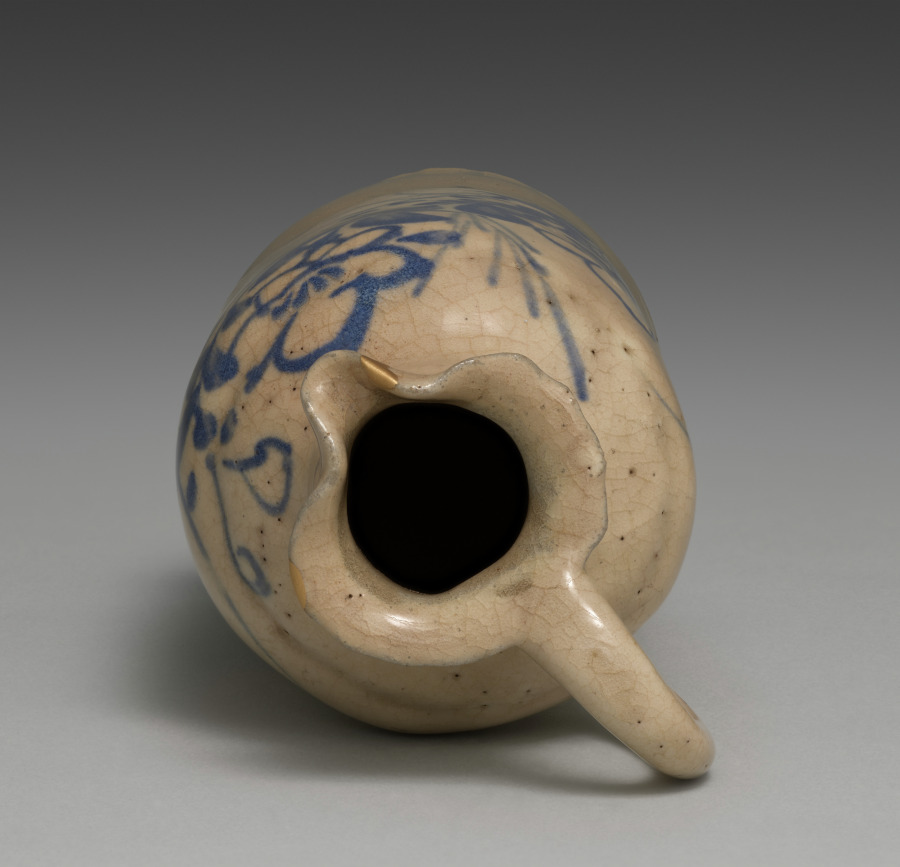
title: Sake Pourer with Bellflowers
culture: Japan, Edo period (1615–1868)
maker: attributed to Seifū Yohei I (Japanese, 1801–1861)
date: c. 1844–57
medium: one of a pair of sake flasks; stoneware with white slip, underglaze blue and gold repair (kintsugi) (Kyoto ware)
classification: Ceramic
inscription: The storage box for the pair of vessels is inscribed and impressed with seals.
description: This pair of sake pourers adorned with with bamboo and bellflowers is attributed to the founder of the Seifū Studio, Seifū Yohei I (1801–1861). Yohei I, the lineage founder, was born to the Yasuda family in the city of Kanazawa, which faces the Sea of Japan. His home province of Kaga (in present-day Ishikawa Prefecture) produced its own ceramics, known as Kutani ware, but for his training as a potter, Yohei I chose Kyoto, which produced the more technically advanced porcelain ware. He moved to Kyoto around the 1820s and became apprenticed to Nin’ami Dohachi, a leading potter in the city. He later struck out on his own, and it is likely that his teacher gave him the name Seifu Yohei. His works include many exquisitely painted copies of Chinese porcelain, and he also produced stoneware with overglaze color enamels that emulated works in the style of Ogata Kenzan (1663–1743) at which his teacher excelled.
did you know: Kintsugi is the Japanese art of repairing broken pottery by mending the areas of breakage with urushi lacquer dusted or mixed with powdered gold.